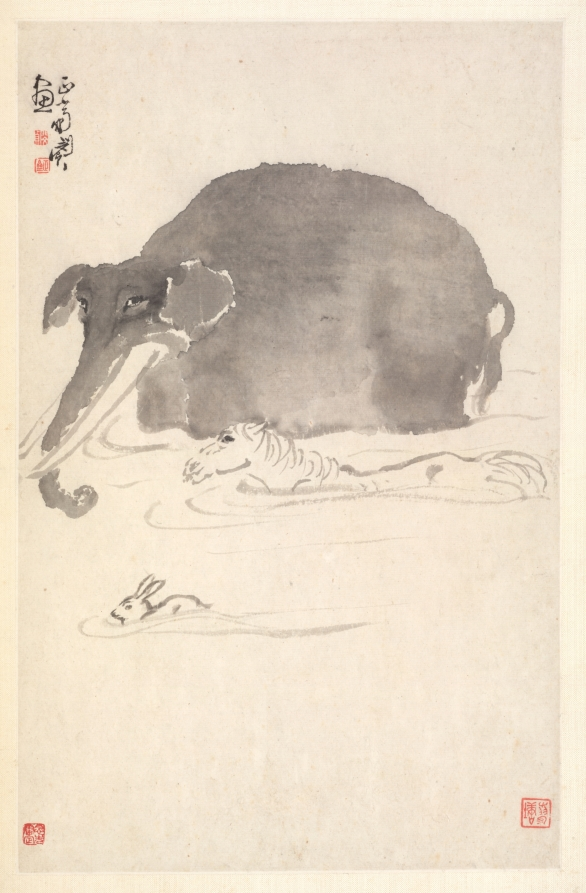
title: Elephant, Horse, and Hare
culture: China, Qing dynasty (1644-1911)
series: Album of Miscellaneous Subjects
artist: Min Zhen (Chinese, 1730–after 1788)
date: 1788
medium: album leaf, ink on paper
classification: Painting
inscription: Six seals appearing on the leaves: Min Zhen 閔貞; Zheng zhai 正齋; Qingqiao 青橋; Zhen 貞; Liao tang 蓼塘; Min Zhen zhi yin 閔貞之印。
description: Min Zhen, who was orphaned at age 12 and developed an eccentric personality, was trained by Tang Yin (1682–1756), a writer, playwright, and superintendent of the imperial porcelain workshops in Jingdezhen. The connection to him may have enabled Min to stay in Beijing for a decade from around 1773. It is not clear whether he ever resided in Yangzhou, but his style is in many instances reminiscent of that of Yangzhou artist Huang Shen. The album was painted for the artist's friend Dailili Shanren in exchange for a scholar’s stone. The paintings demonstrate Min Zhen’s versatility and mature style in the last years of his life. This leaf, Elephant, Horse, and Hare, seems to exhibit a contest, and may be associated with the recipient’s affinity to Buddhism (elephant), Confucianism (horse), and Daoism (hare).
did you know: The artist might have seen an elephant in the imperial zoo when he worked in Beijing from 1773 to 1784.